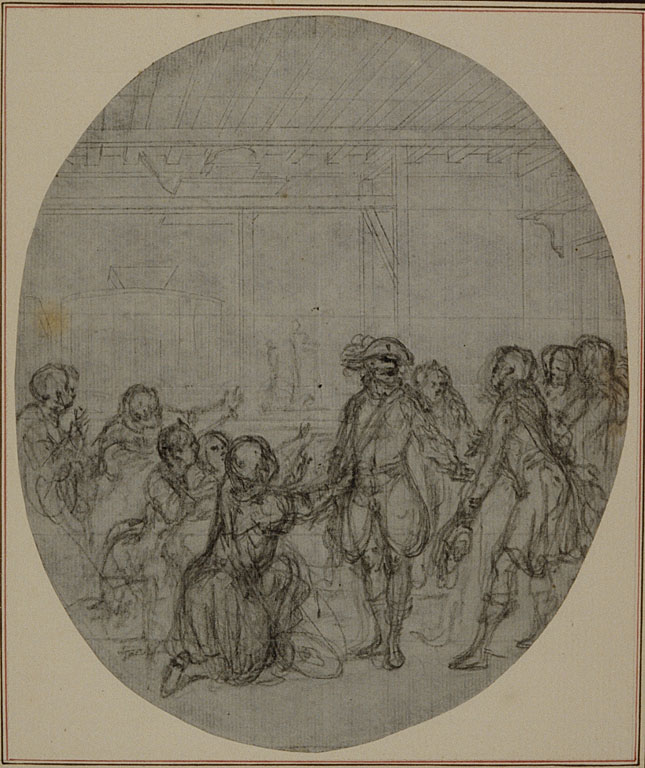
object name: Drawing and Watercolor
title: Study for a second edition, never published, of Colle's "La Partie de Chasse de Henri IV", Act III, Scene 13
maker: Hubert François Gravelot (French, 1699-1773)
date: before 1766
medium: Black chalk, with graphite, on oval-shaped gray laid paper, incised for transfer and perimeter mounted on ivory laid paper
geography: France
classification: charcoal; drawings (visual works); prints and drawing